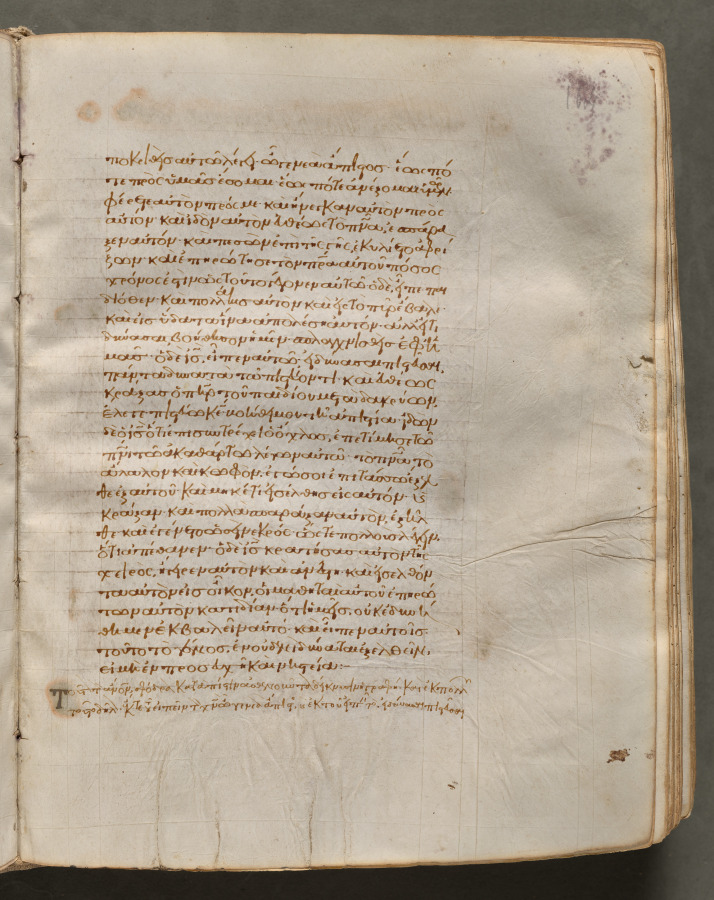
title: Text, folio 164 (recto), from a Gospel Book with Commentaries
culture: Byzantium, Constantinople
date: c. 1000–1100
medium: ink, tempera, and gold on vellum; leather binding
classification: Bound Volume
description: Each of the four gospels in this book opens on a page with brilliantly illuminated borders depicting the author of the text as well as birds-principally peacocks, symbols of the immortality of the soul-and fountains, representing the fountain of life and the salvation of the soul. This volume consists of 428 leaves with texts in Greek. Its level of sophistication suggests that it was probably written and decorated in a monastery in Constantinople.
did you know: Gospel Books were carried in procession through Byzantine churches.